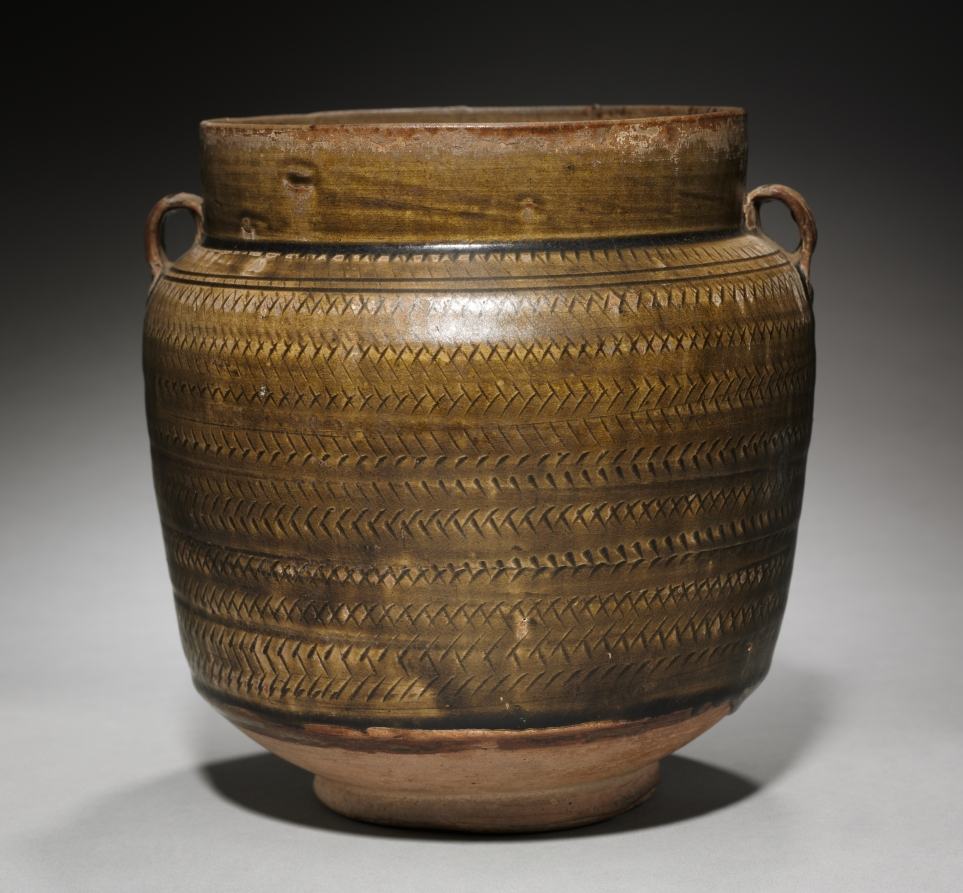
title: Jar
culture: China, Northern, Tang dynasty (618-907) - Five dynasties (907-960)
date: 800s–900s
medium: Glazed pinkish-buff stoneware; Brown ware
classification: Ceramic